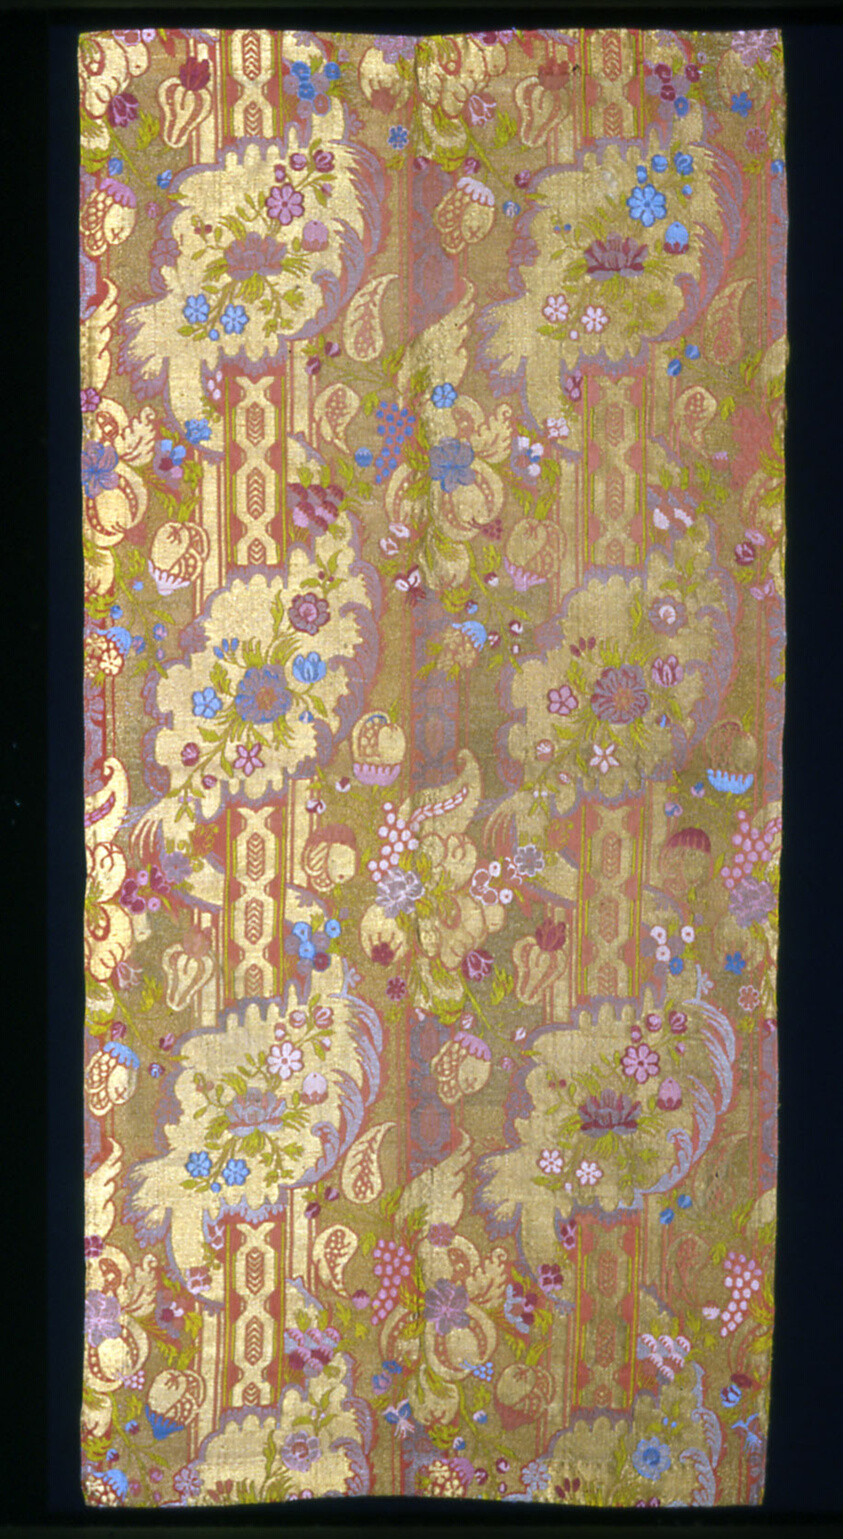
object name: Textile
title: Panel (Dress Fabric)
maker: France, Lyon or Italy, Venice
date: 1700/10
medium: Silk and gilt-metal-strip-wrapped silk, satin weave with twill interlacings of secondary binding warps and patterning and brocading wefts, and self-patterning ground wefts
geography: France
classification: textile; weaving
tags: foliage, fruit, flowers